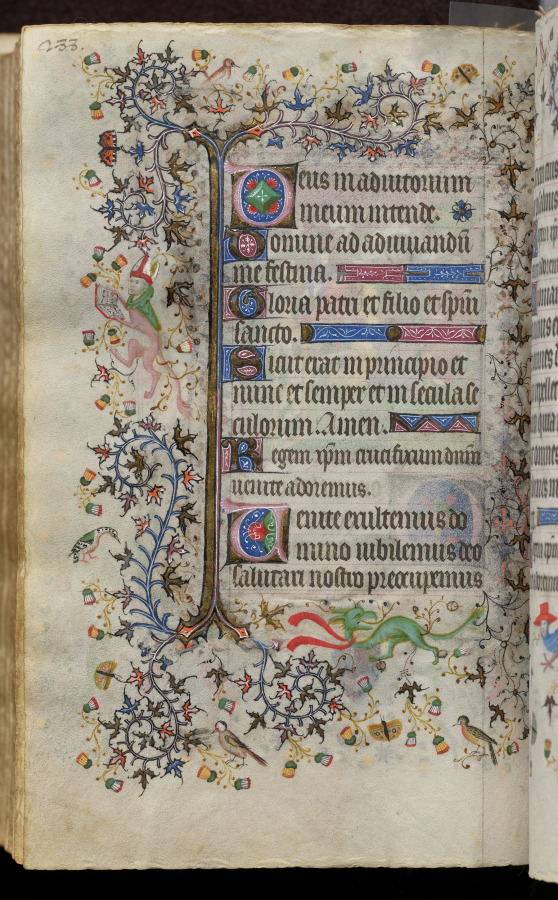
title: Hours of Charles the Noble, King of Navarre (1361-1425): fol. 144r, Text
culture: France, Paris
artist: Master of the Brussels Initials and Associates (French)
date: c. 1405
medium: ink, tempera, and gold on vellum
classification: Bound Volume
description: This precious volume was obviously highly prized by its owner, the French-born King of Navarre, who had his coat of arms painted on no less than twenty folios. Rather than directly commissioning this manuscript from a specific workshop, it seems that Charles the Noble acquired his book of hours -- perhaps ready-made for the luxury market -- while on a trip to Paris in 1404-05. A collaborative effort, six painting styles are evidenced within the pages of this codex, those of two Italians, two Frenchmen, and two Netherlanders. The painter who was responsible for the planning and decoration of the book, and who produced seventeen of the large miniatures, was a Bolognese artist known as the Master of the Brussels Initials. His principal assistant, responsible for most of the borders, was a Florentine who signed his name "Zecho" da Firenze on folio 208 verso.